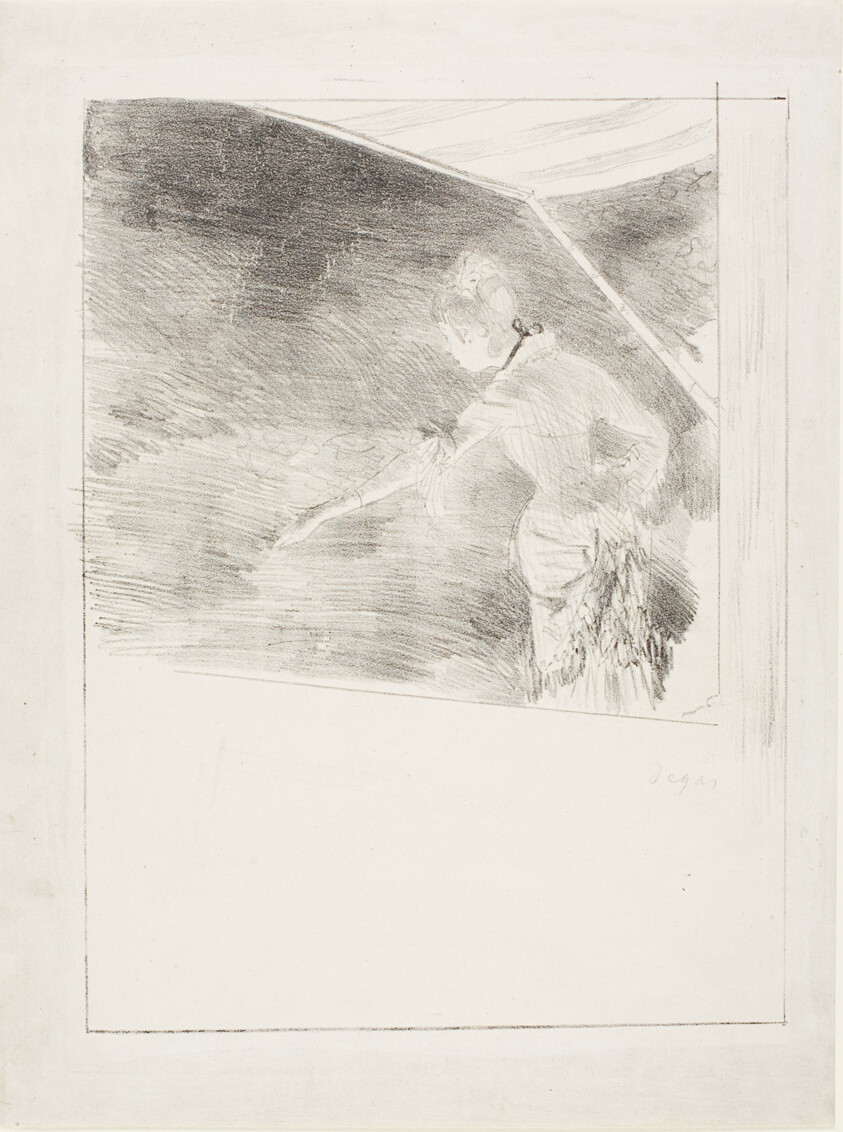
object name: Print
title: Singer at a Café-Concert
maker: Edgar Degas; French, 1834-1917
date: 1876–77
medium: Lithograph in black on off-white wove paper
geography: France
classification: lithograph; print; prints and drawing; paper